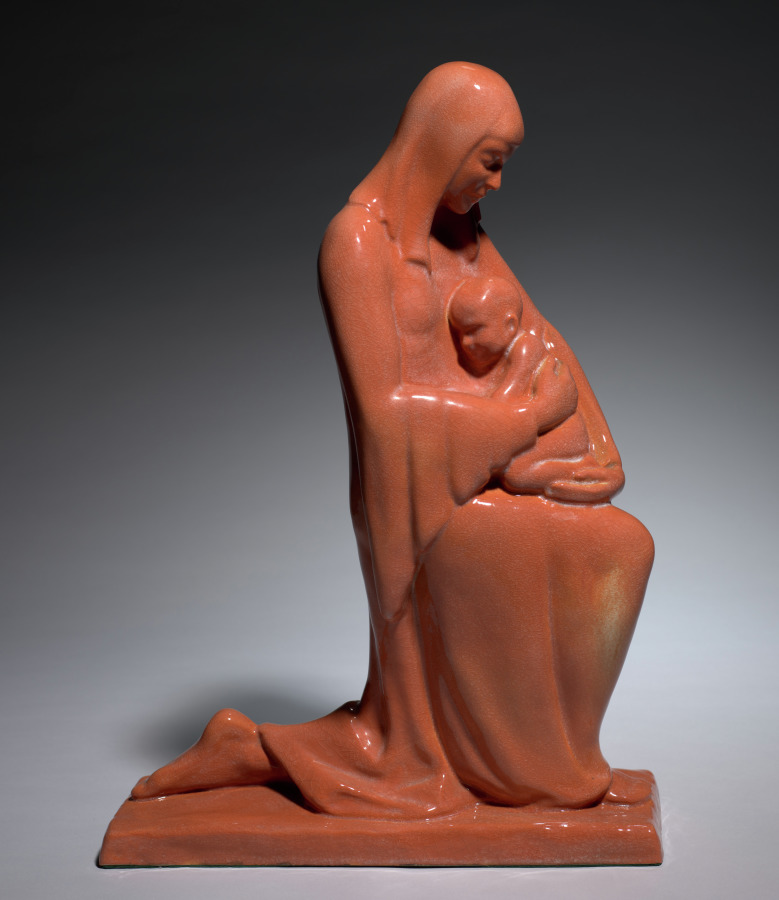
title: Madonna and Child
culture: America, Ohio, Cleveland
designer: R. Guy Cowan (American, 1884–1957)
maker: Cowan Pottery Studio (America, Ohio, Lakewood, 1913–1919)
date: c. 1928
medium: pottery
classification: Ceramic